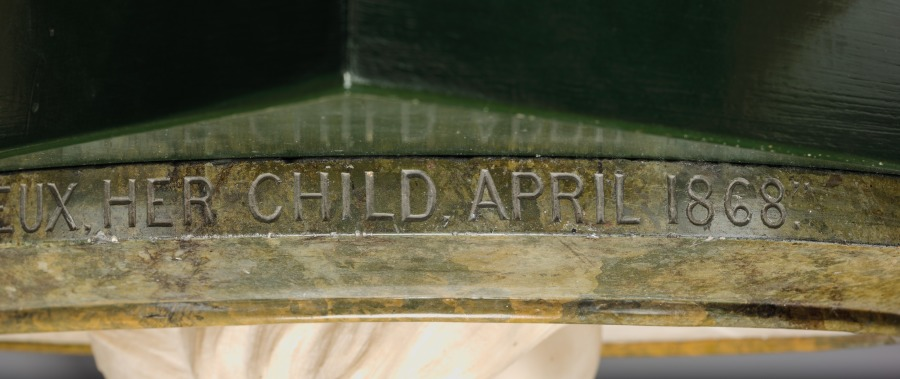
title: Mary, Lady Molyneux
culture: England, 19th century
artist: Alexander Munro (British, 1825–1871)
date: 1868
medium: marble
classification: Sculpture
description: Munro's method of portraying Lady Molyneux, with her head placed squarely in the center of a circle and her hair radiating outward from her face, gives the image an unusual emotional intensity that is probably the result of focusing relentlessly on the particular character of her features.